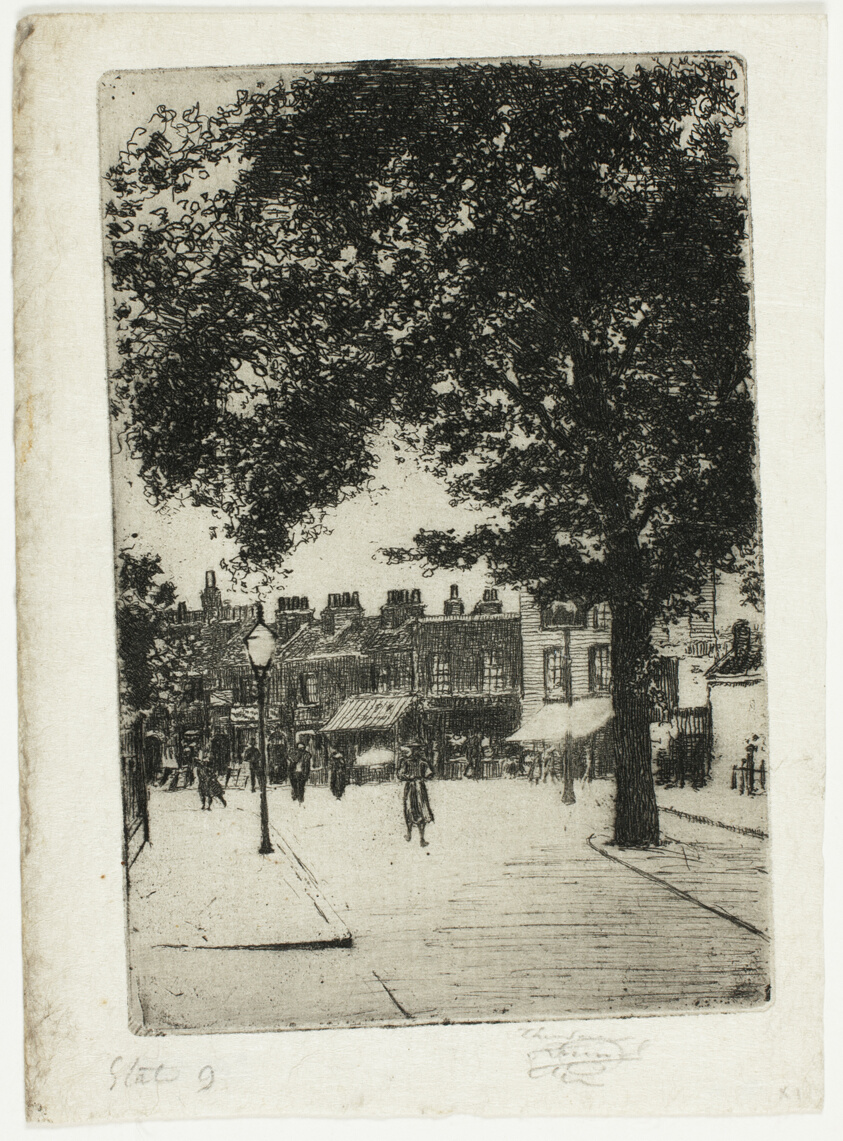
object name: Print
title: The Sign of White Horse, Parson's Green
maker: Theodore Roussel (French, worked in England, 1847-1926)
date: 1906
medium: Etching in black on ivory Japanese paper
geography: England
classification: etching; paper; print; prints and drawing